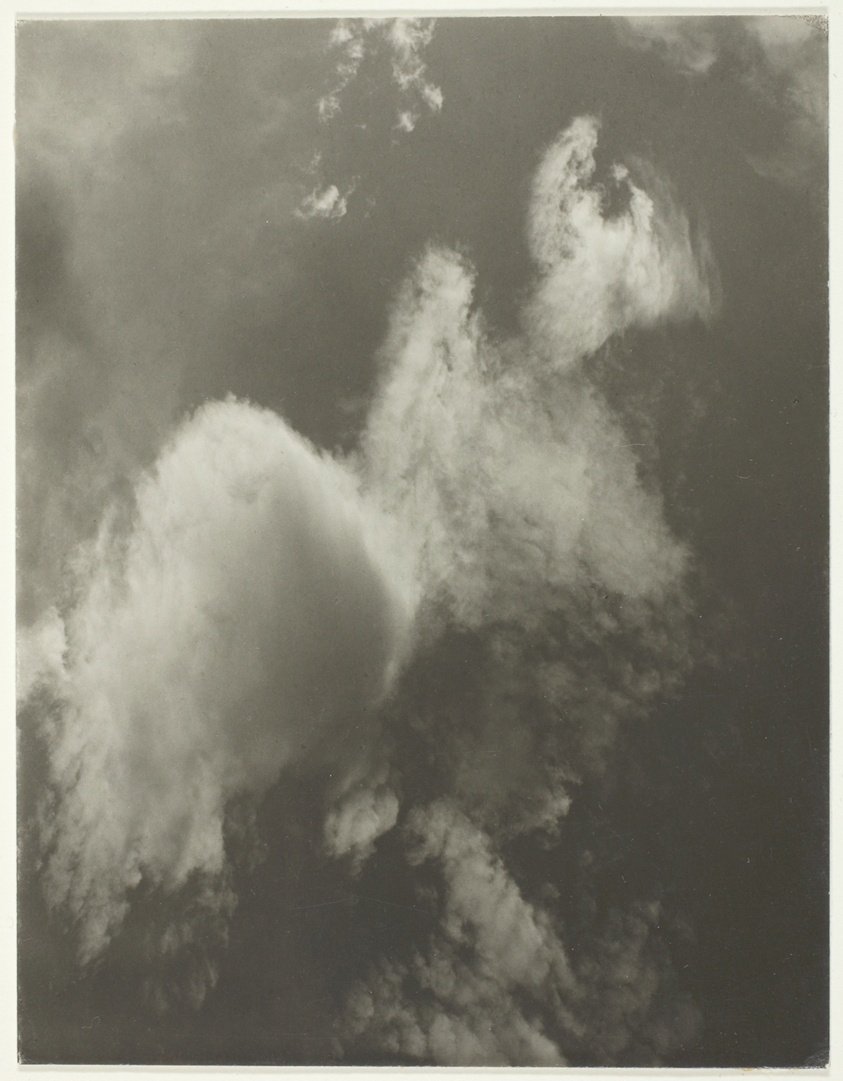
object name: Photograph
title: Equivalent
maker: Alfred Stieglitz (American, 1864–1946)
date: 1925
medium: Gelatin silver print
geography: United States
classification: gelatin silver (developing-out-paper) pr; photographic process; photography; photograph